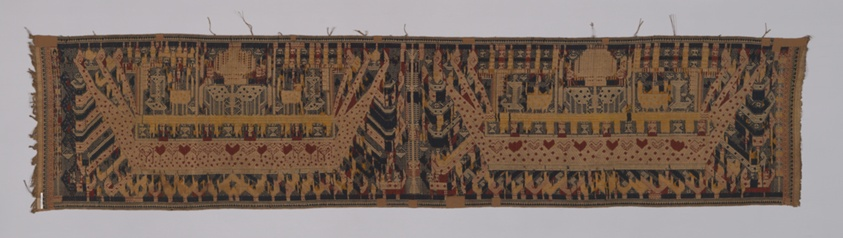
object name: Religious/Ritual Object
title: Ceremonial Hanging (palepai)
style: indonesian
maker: Paminggir people; Indonesia, South Sumatra, Lampung area, Kalianda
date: 19th century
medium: Cotton, silk, and silver-leaf-over-lacquered-paper-strip-wrapped bast fiber (probably ramie), plain weave with supplementary patterning and brocading wefts, main warp fringe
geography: Indonesia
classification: textile; weaving; ritual objects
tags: boats, figures (representations), seas, waves